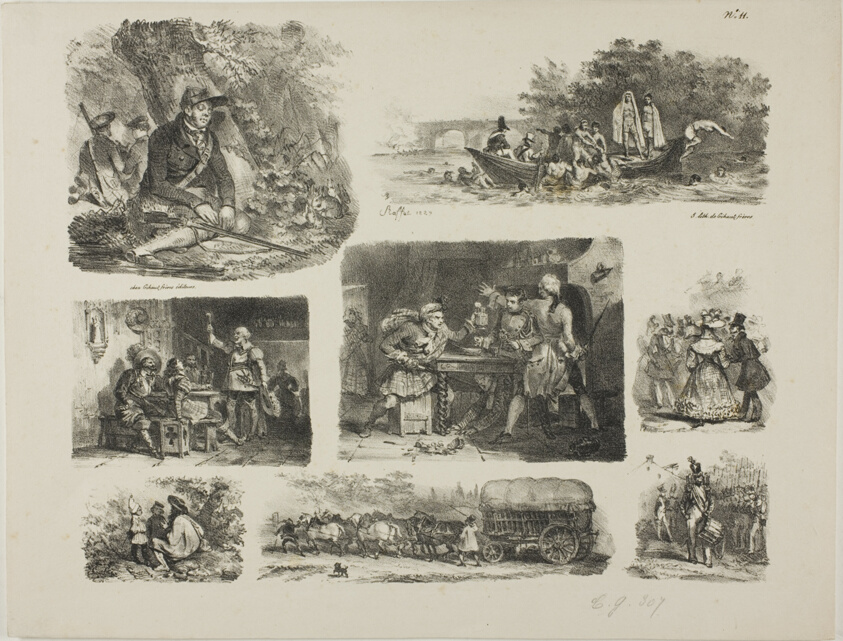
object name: Print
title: Sheet of Sketches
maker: Denis Auguste Marie Raffet (French, 1804-1860); published by Chez Gihaut Frères (French, 19th century)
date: 1829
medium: Lithograph in black on ivory wove paper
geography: France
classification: lithograph; print; prints and drawing